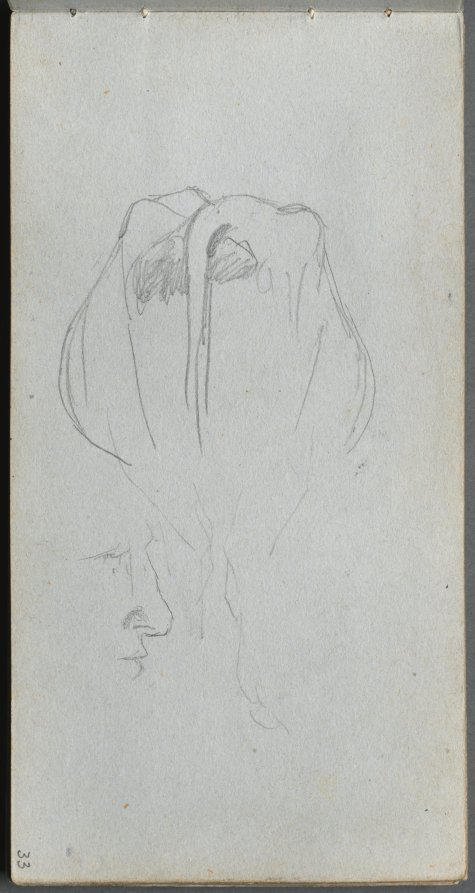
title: Sketchbook, page 33: Study of a Cow from Behind and Profile Study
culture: France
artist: Ernest Meissonier (French, 1815–1891)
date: c. 1860s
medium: graphite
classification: Bound Volume